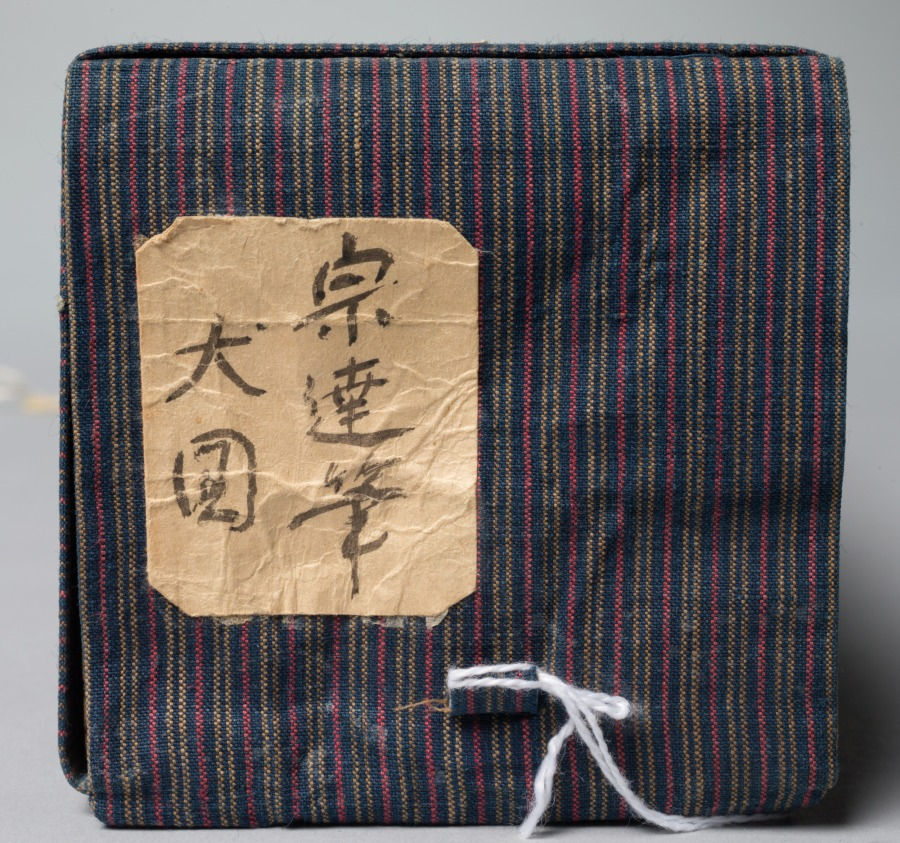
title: Puppy with Dandelions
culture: Japan, Edo period (1615–1868)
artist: studio of Tawaraya Sōtatsu (Japanese, c. 1570–c. 1640)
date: 1600–1640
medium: hanging scroll; ink on paper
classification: Painting